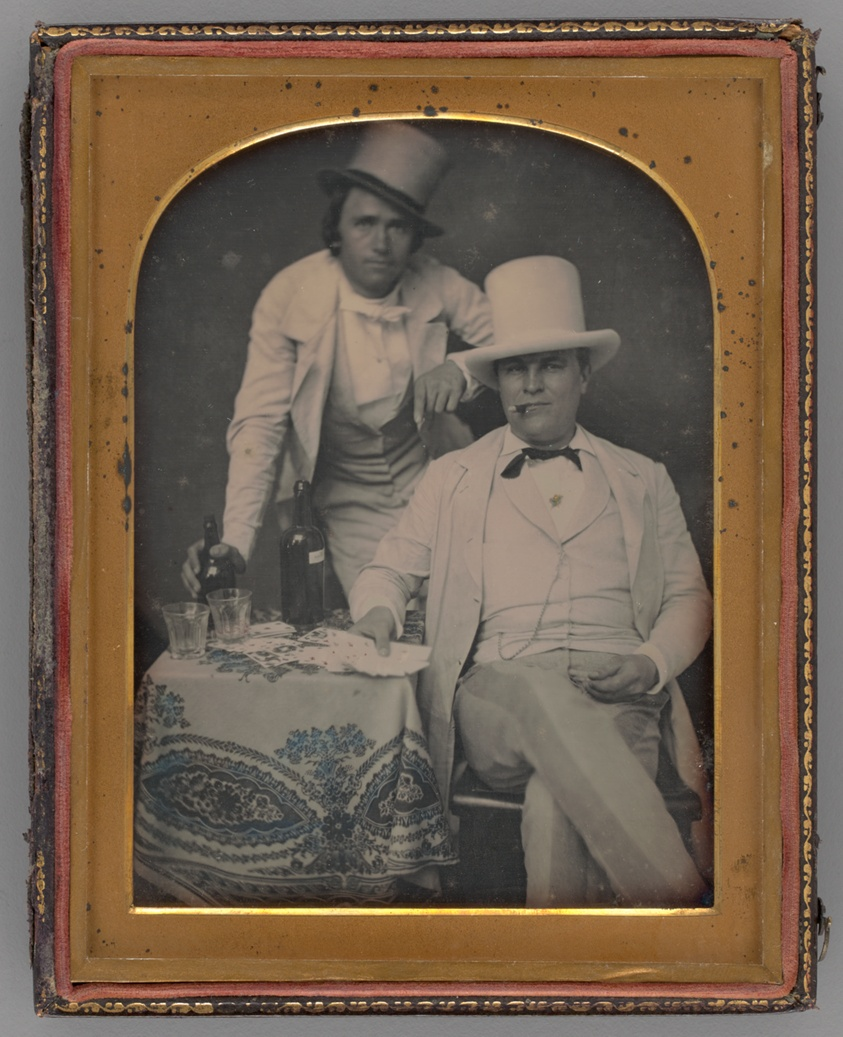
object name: Photograph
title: Untitled (Portrait of Two Men)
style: 19th century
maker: Jesse Harrison Whitehurst; American, 1819–1875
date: 1855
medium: Daguerreotype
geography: United States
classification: portrait; photograph; photographic process; photography; portrait; daguerreotype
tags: lundberg collection, portrait, men, Male, portraits: multiple subjects, portraits: male subject, portraits